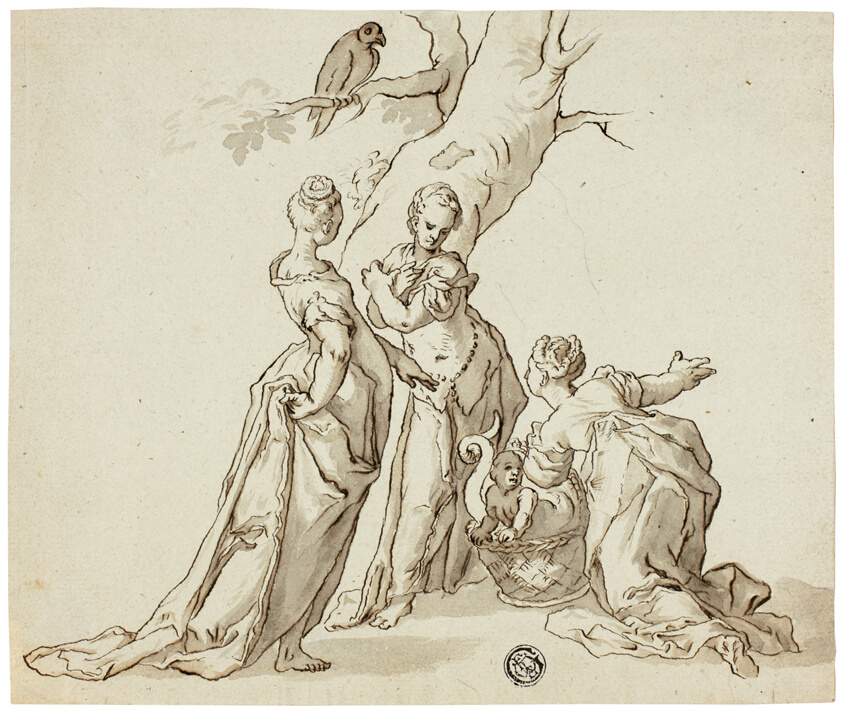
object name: Drawing and Watercolor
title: Discovery of Erichthonius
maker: Unknown Artist; German, 1600-1799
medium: Pen and brown ink with brush and brown wash over graphite, on ivory laid paper, tipped onto pink wove paper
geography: Germany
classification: pen and ink drawings; drawings (visual works); prints and drawing